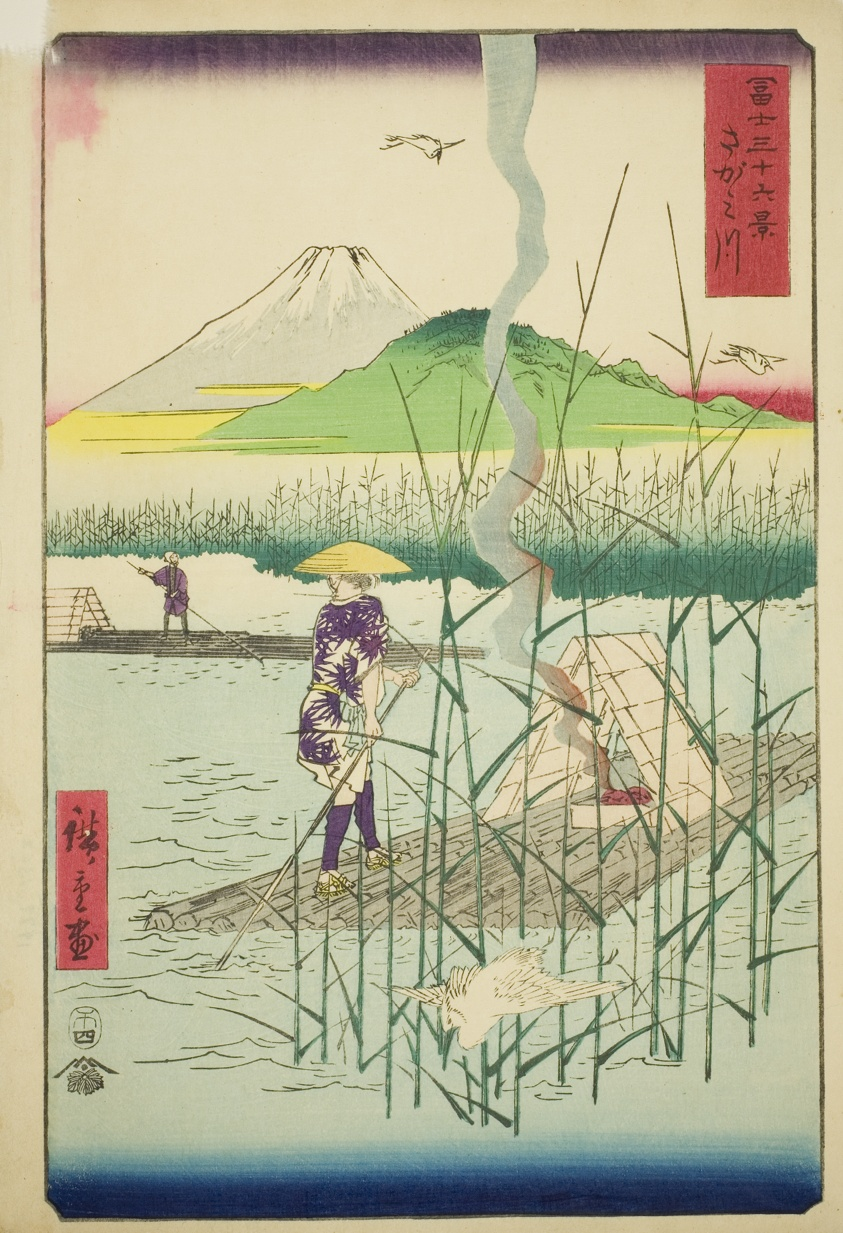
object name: Print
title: Sagami River (Sagamigawa), from the series "Thirty-six Views of Mount Fuji (Fuji sanjurokkei)"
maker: Utagawa Hiroshige 歌川 広重; Japanese, 1797-1858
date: 1858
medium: Color woodblock print; oban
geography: Japan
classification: print; asian art